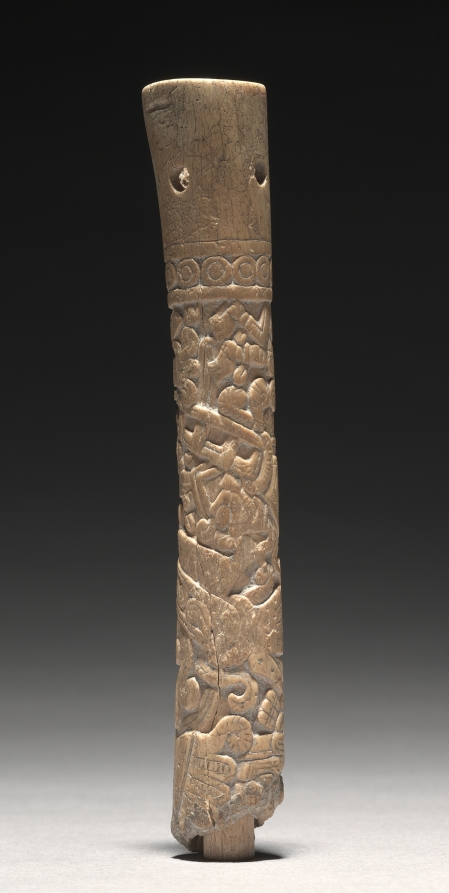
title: Carved Tube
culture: Mexico, Oaxaca, Mixtec, 13th-16th century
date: c. 1200–1519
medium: bone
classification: Jewelry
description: Carved in spiral registers, the ornamentation on this bone tube resembles Mixtec painting, both in codices (screenfold books) and architectural murals.